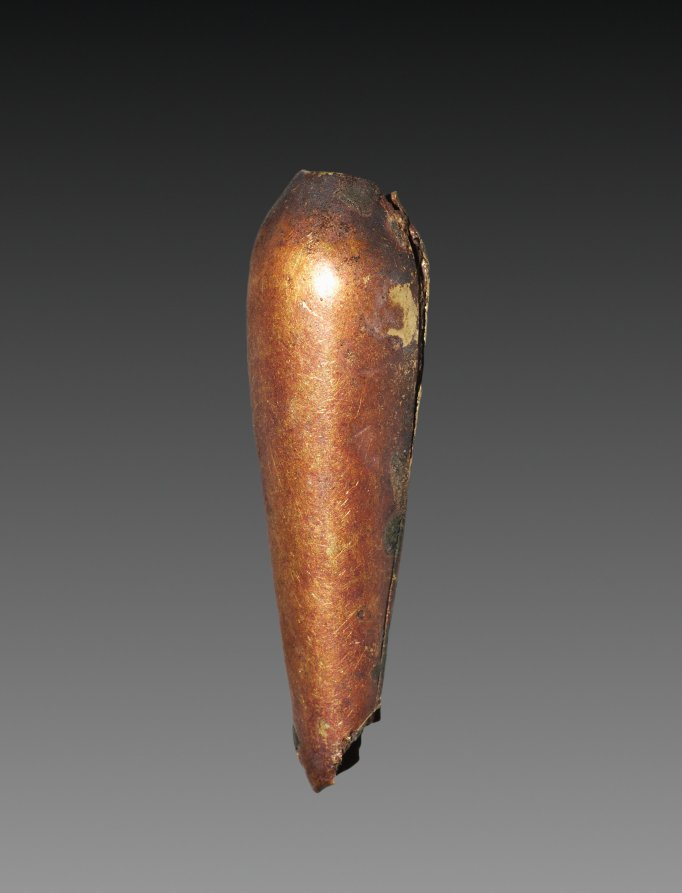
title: Teardrop-Shaped Bead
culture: Egypt, Middle Kingdom (2040–1648 BCE), Dynasty 12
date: 1980–1801 BCE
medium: gold over calcite gesso core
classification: Jewelry